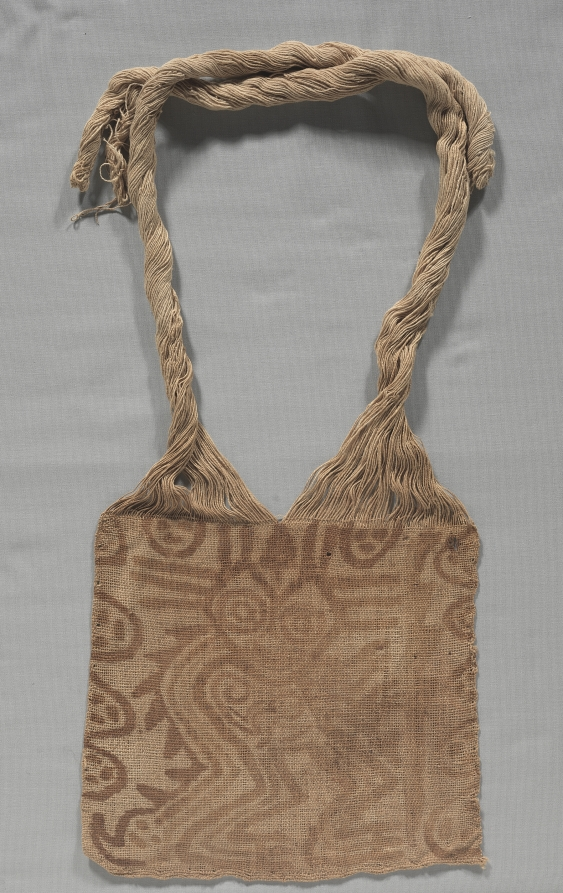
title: Mummy Bundle "Mask"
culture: Peru, South Coast, Ica Valley, Ocucaje site, Paracas style (700 BCE–1 CE)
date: 200–1 BCE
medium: plain warp-faced cloth, painted: cotton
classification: Textile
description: The Paracas people of Peru's South Coast buried their dead in pear-shaped mummy bundles made of a seated human body carefully wrapped in garments and other textiles. Sometimes a painted cloth was placed at the top of the bundle, as though it served as the bundle's face, head, or "mask." The cloth was padded on the back so it curved outward like a face, and the tress-like yarns (unwoven warps) at the upper edge were arranged around a solid cotton disk that, in turn, was wrapped with a headband. Some cloths were painted with mask-like faces, and others with full figures, apparently mythical creatures.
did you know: These masks fall into two categories, those with only a face and those with a full-bodied figure.